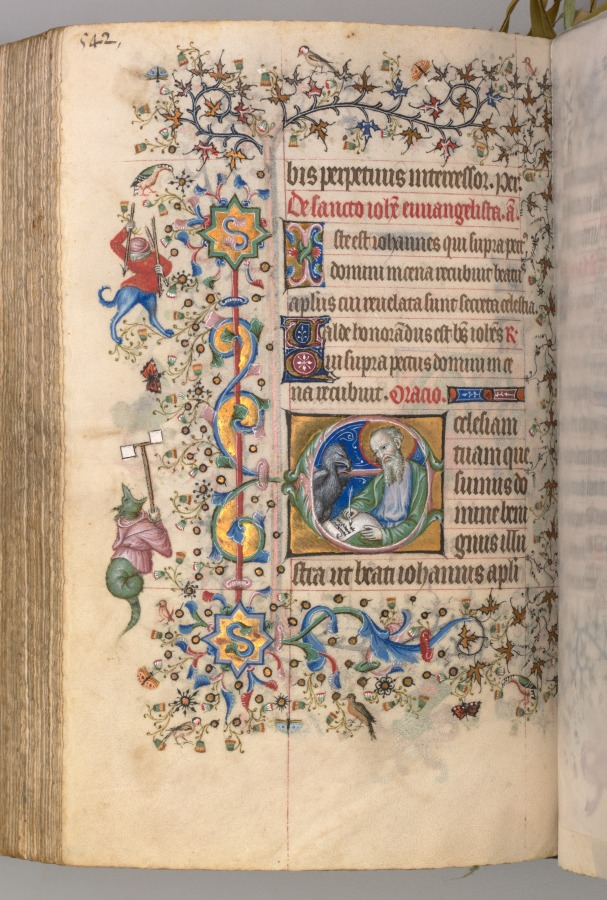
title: Hours of Charles the Noble, King of Navarre (1361-1425): fol. 265v, St. John the Evangelist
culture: France, Paris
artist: Master of the Brussels Initials and Associates (French)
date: c. 1405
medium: ink, tempera, and gold on vellum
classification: Bound Volume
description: This precious volume was obviously highly prized by its owner, the French-born King of Navarre, who had his coat of arms painted on no less than twenty folios. Rather than directly commissioning this manuscript from a specific workshop, it seems that Charles the Noble acquired his book of hours -- perhaps ready-made for the luxury market -- while on a trip to Paris in 1404-05. A collaborative effort, six painting styles are evidenced within the pages of this codex, those of two Italians, two Frenchmen, and two Netherlanders. The painter who was responsible for the planning and decoration of the book, and who produced seventeen of the large miniatures, was a Bolognese artist known as the Master of the Brussels Initials. His principal assistant, responsible for most of the borders, was a Florentine who signed his name "Zecho" da Firenze on folio 208 verso.